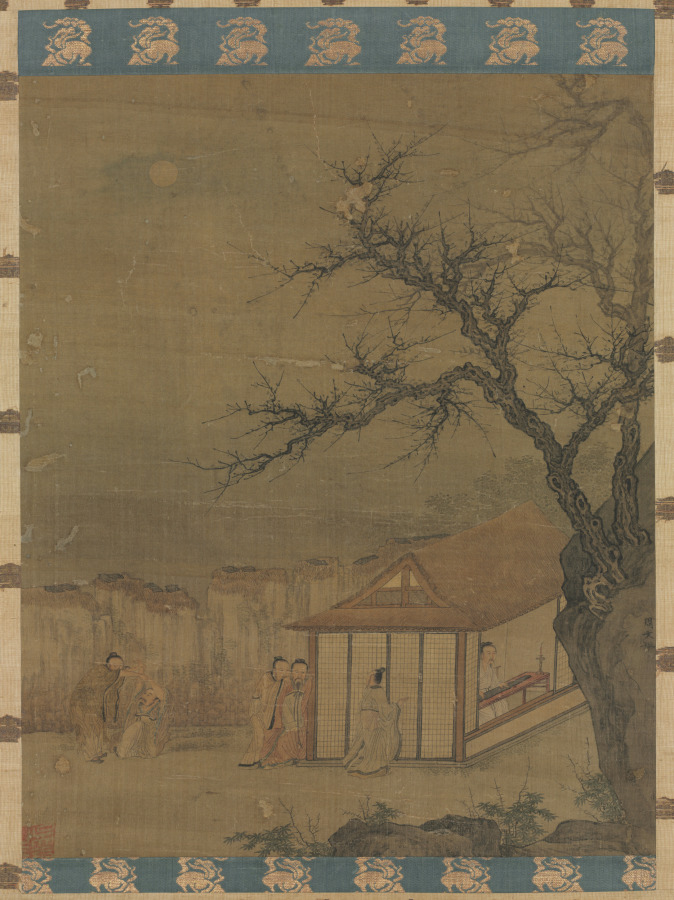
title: Listening to the Qin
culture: China, Ming dynasty (1368–1644)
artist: attributed to Tang Yin (Chinese, 1470–1523)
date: late 1400s–early 1500s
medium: hanging scroll; ink and light color on silk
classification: Painting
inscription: Artist's seal at lower left corner: Wu [remainder cut off].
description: The painting alludes to a legendary incident from the life of Ji Kang 嵇康 (AD 223–262), a guqin player who belonged to a group of 3rd-century eccentric intellectuals. Ji Kang is known as the author of a Guangling San (廣陵散; Melody from Guangling), a composition for the guqin so haunting that it aroused spirits to visit him. The painting depicts the moment when one of the spirits––disguised as a human––is helped by another to emerge from the ground, while others are drawn to the musician playing in his cottage under the full moon.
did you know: The painting is mounted in a Japanese-style three-tier format with futai.